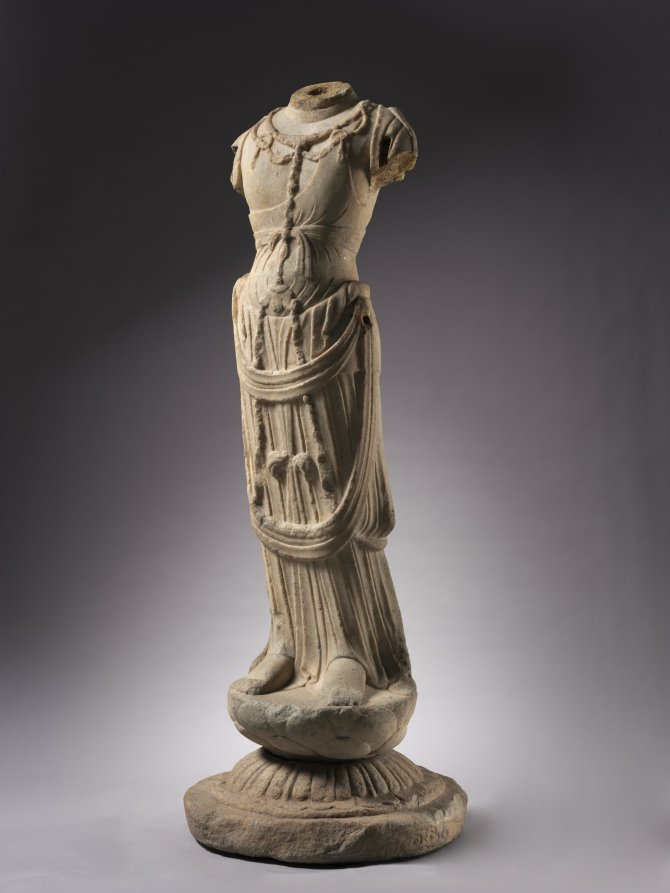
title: Bodhisattva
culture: China, Hebei province, Tang dynasty (618-907)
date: 700s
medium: white marble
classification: Sculpture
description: The bodhisattva is an enlightened being dedicated to the spiritual awakening of all beings. This white marble torso exemplifies the quest for refinement and plasticity of form that mark the golden era of Tang Chinese Buddhist sculpture. The statue was conceived with great power and grandeur. The slight sway of the hip on one side and upraised shoulder on the other result in an elegant S-curve. Emphatic lines cut into the stone create a sense of rhythm and reveal the sculptor’s skill and sureness of execution.